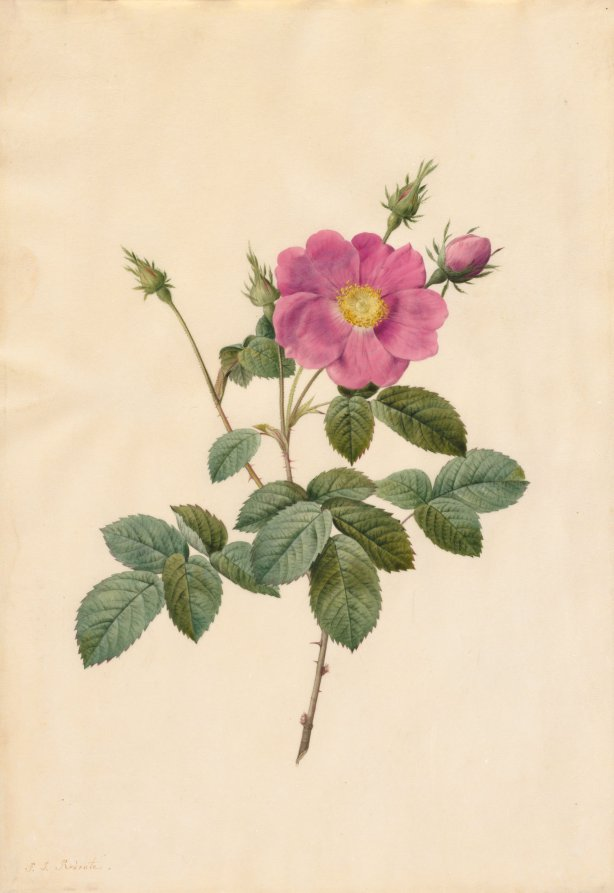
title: Cabbage Rose (Rosa Centifolia Simplex)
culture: France, 19th century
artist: Pierre-Joseph Redouté (French, 1759–1840)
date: 1817–24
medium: watercolor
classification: Drawing